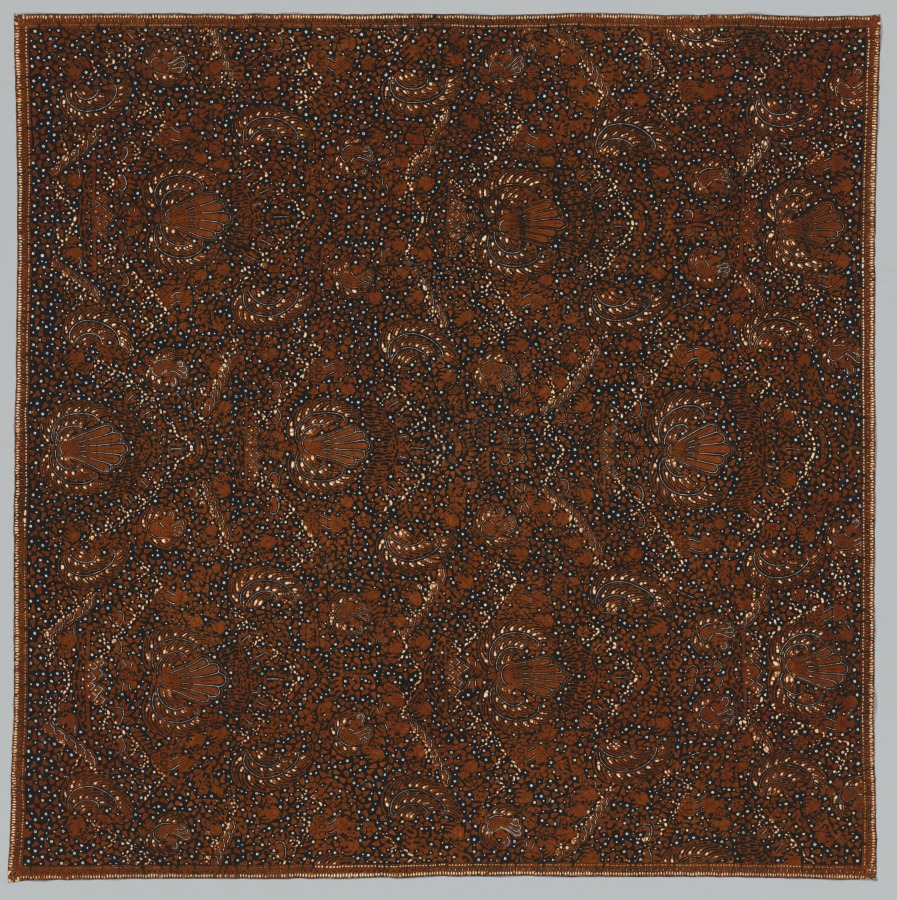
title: Head Cloth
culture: Indonesia, Central Java, late 19th century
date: late 1800s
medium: batik; cotton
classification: Textile